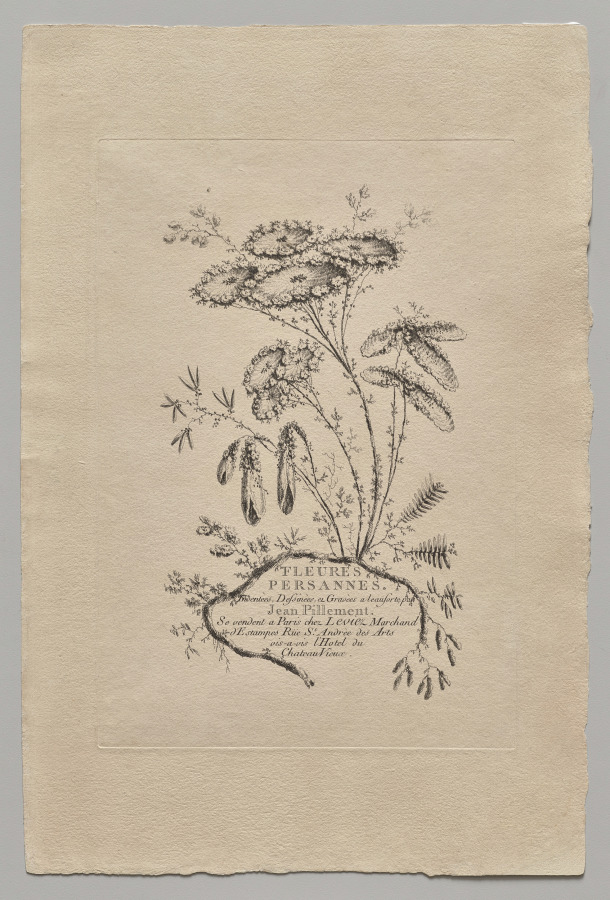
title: Persian Flowers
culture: France, 18th century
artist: Jean Baptiste Pillement (French, 1728–1808)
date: 1755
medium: etching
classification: Print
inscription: in plate: Fleures Persannes. Inventées, Dessinées, et Gravées a leauforte, par Jean Pillement. Se vendent a Paris chez Leviez Marchard d'Estampes Rue St. Andrée des Arts vis-a-vis l'Hotel du Chateau Vieux.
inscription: Watermark along the left edge, partially deciphered by dealer: a Heart followed by SAUVI…FIN…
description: Jean Baptiste Pillement was one of the most influential designers of the Rococo period, known for his varied and prolific chinoiseries (European variants of Chinese and Japanese motifs). His designs were spread throughout Europe primarily via their translation into prints. This print is one of a set of six etched by Pillement himself. Each depicts a so-called “Persian” flower, largely fantasies, presenting strange, alienlike floral forms that could be adapted to various uses from textiles to wall decorations.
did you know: The artist Jean Baptiste Pillement was employed by Marie Antoinette to create decorations for her legendary retreat, the Petit Trianon, at Versailles.